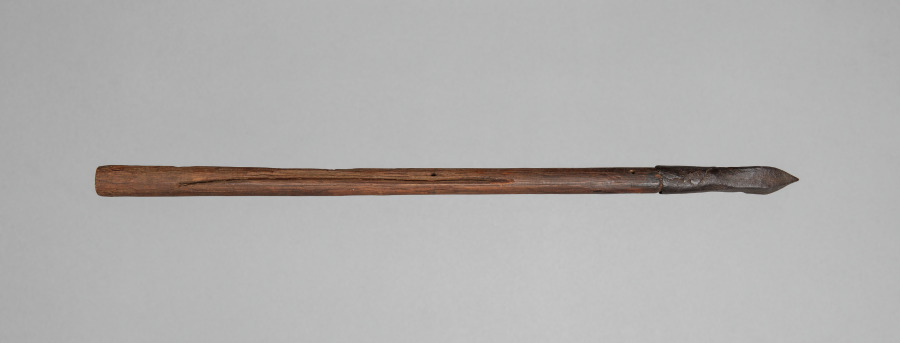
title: Crossbow Bolt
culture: Germany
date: 1600s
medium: wood (flights missing) and steel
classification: Arms and Armor